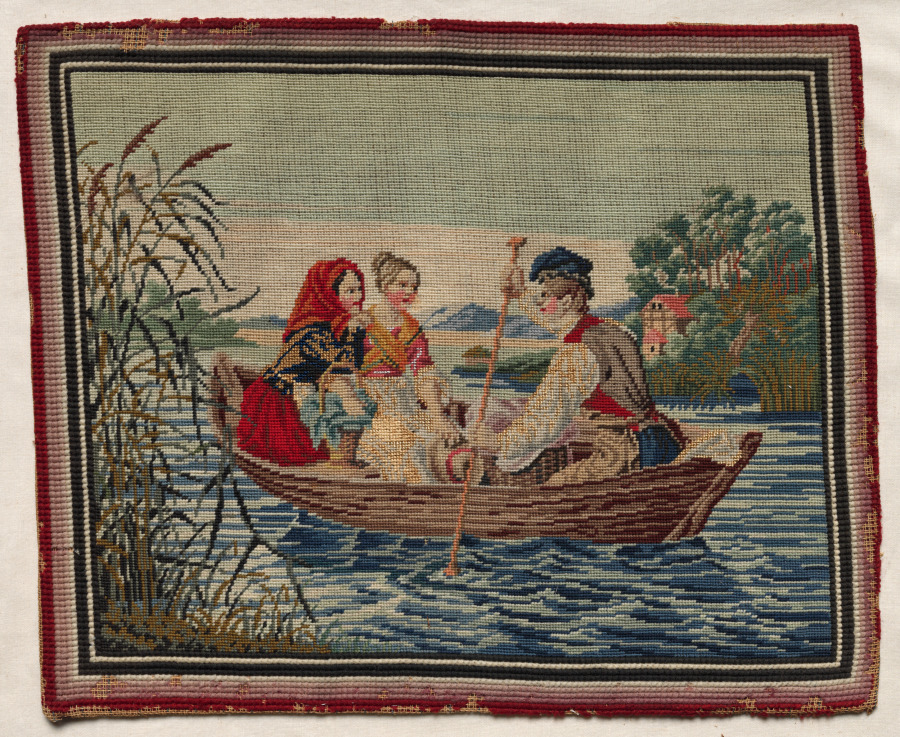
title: Embroidery Picture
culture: America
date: 1850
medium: embroidery: wool and silk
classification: Embroidery